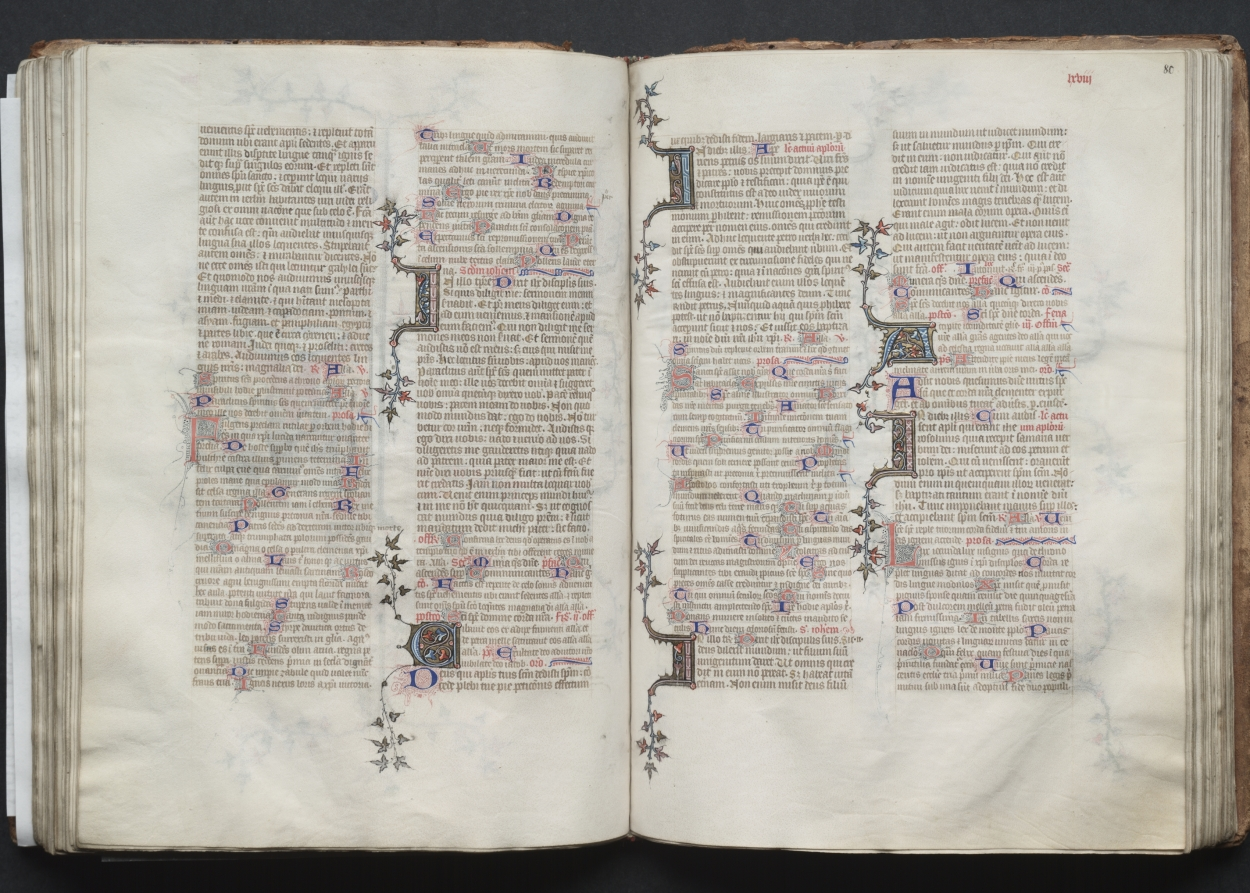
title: The Gotha Missal: Fol. 79v, Text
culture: France, Paris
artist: Master of the Boqueteaux (French)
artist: and Workshop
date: c. 1375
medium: ink, tempera, and gold on vellum; blind-tooled leather binding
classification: Bound Volume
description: The style and quality of this manuscript's decoration is typical of deluxe Parisian books made for aristocratic or royal patrons. Most of the book's decoration appears to be the work of the Master of the Boqueteaux, an artist active at the court of King Charles V (died 1380). His style was apparently shared by a number of book illuminators working in and around Paris. It is very possible that the Gotha Missal belonged to Charles V, but is not provable because the manuscript has no royal portraits and lacks a colophon. Given the book's magnificent decoration, however, it would seem that it was produced for a Valois prince, if not for the king himself. The manuscript receives its name from the German dukes of Gotha, its later owners.